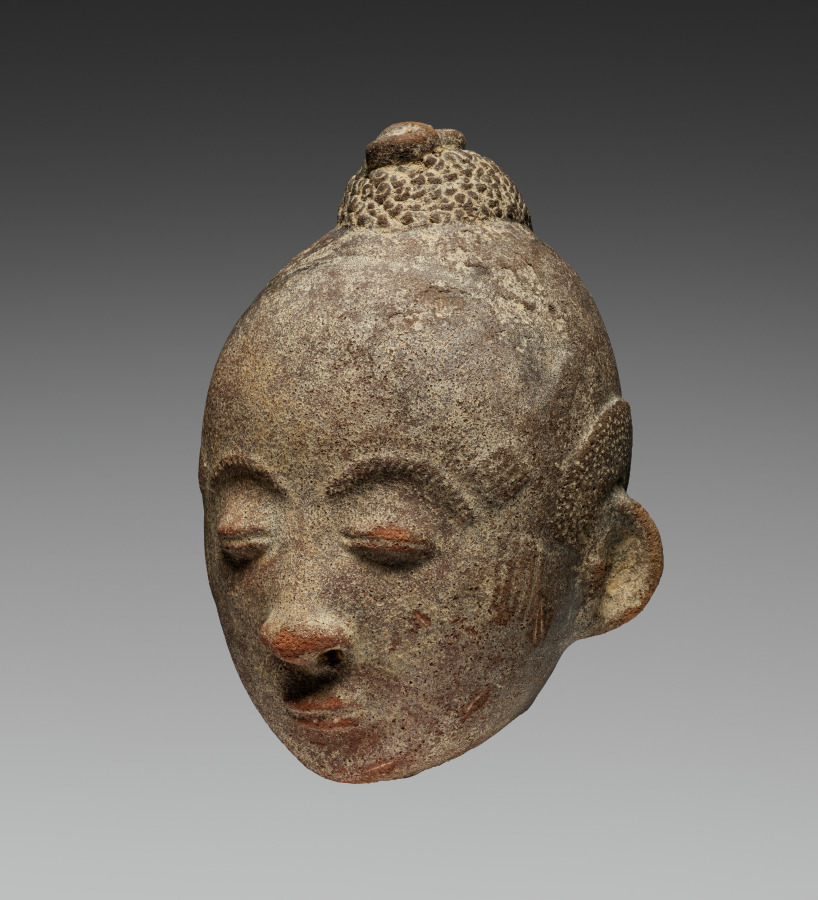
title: Memorial head (nsodie)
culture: Ghana, Akan-style sculpture, unknown female ceramicist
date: late 1600s–early 1700s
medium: Terracotta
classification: Sculpture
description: This is an idealized portrait of an Akan royal. The Akan states formed in West Africa around the 1400s. Akan royal family members commissioned terracotta portraits like this from female artists during someone’s life. Following their death and burial, the family placed these sculptures in a sacred grove. The woman who sculpted this head over 300 years ago worked from memory, without sketches. The resulting sculpture combined idealized physical qualities of elite figures with individual details. The hairstyle and skin color of this portrait reflect its subject’s individuality. In contrast, his calm expression reflects the desired “cool composure” of elites.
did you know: The woman who sculpted this head did so without making a sketch, working from her memory of the subject.